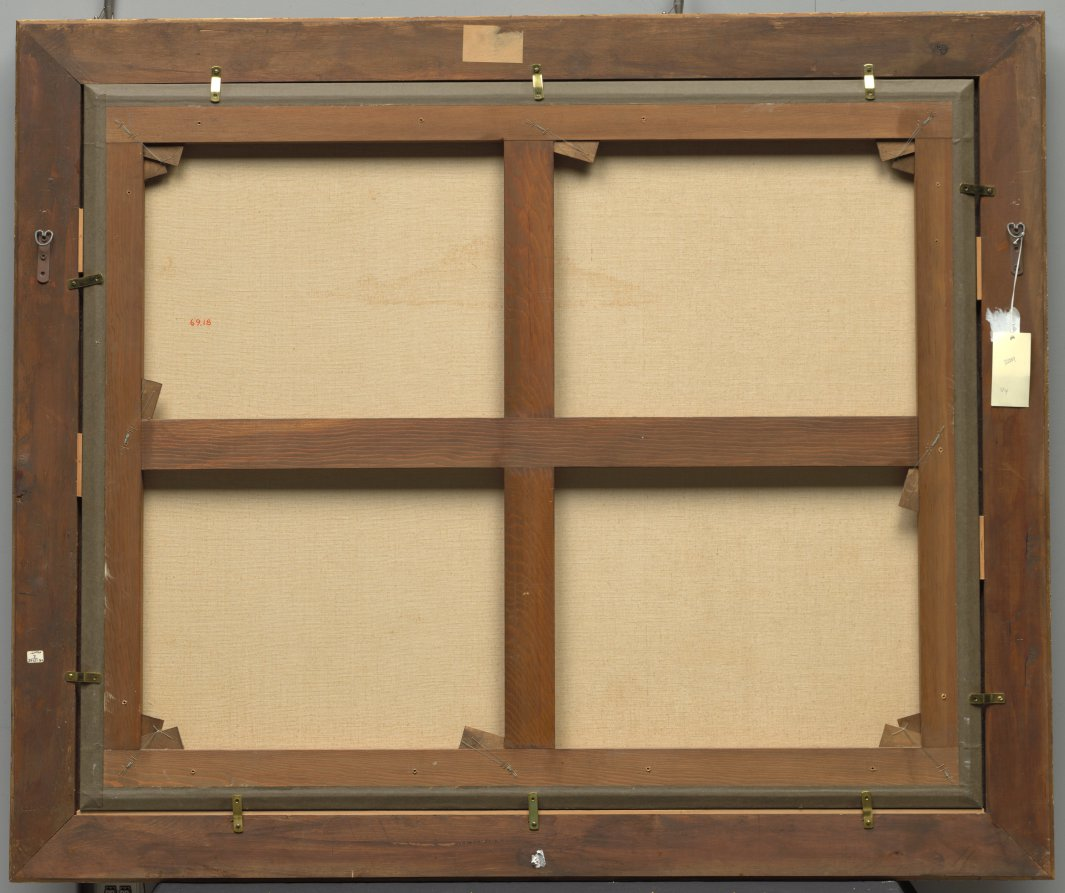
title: Peasants Crossing a Stream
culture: Flanders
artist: Jan Siberechts (Flemish, 1627-c. 1703)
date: c. 1670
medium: oil on canvas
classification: Painting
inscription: Signed lower left: "J. sibrechts. A. anvers."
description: The painting is characteristic of Jan Siberechts's Antwerp style, characterized by scenes with fords through which peasants wade with their cattle. The peasants wear simple but brightly colored attire and stand out against the cool green landscape. Flanked by overgrown foliage, the silver hues of the still stream shimmer with reflections. Over the course of his career, which included moving to London in 1672, Siberechts continued to use many of the same figures in his paintings, including Flemish peasant women carrying jugs, like the one seen in this painting. Likewise, his approaches to depicting animals, such as the cows seen here, changed very little over time and are ubiquitous throughout his oeuvre.